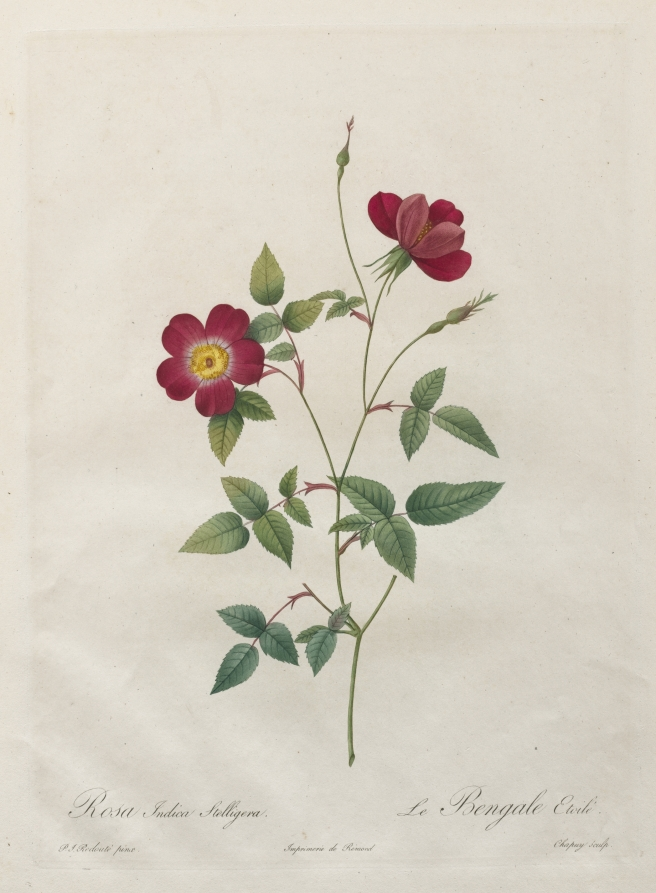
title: Rosa Indica Stelligera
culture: France, 19th century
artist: Henri Joseph Redouté (French, 1766–1853)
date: 1817–1824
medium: stipple and line engraving, with hand coloring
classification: Print